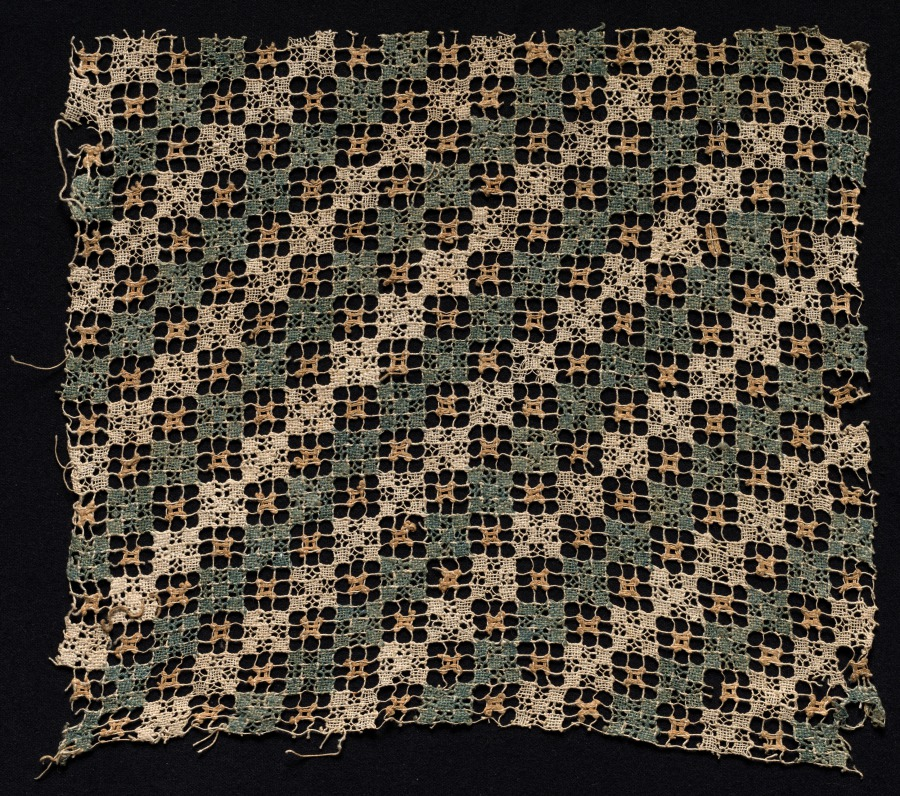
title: Fragment with Repeated Square Pattern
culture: Italy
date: 1500s–1600s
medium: Bleached, dyed, and unbleached linen (est.): needle lace; filet/lacis (knotted ground and darned in two directions)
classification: Lace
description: The prominent colors on this fragment of lace also determine the diagonal and square patterns within the textile. The dark yellow is unbleached linen, the white is bleached linen, and the blue is linen that has been bleached and dyed.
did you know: The word lace derives from the Latin laqueus, meaning noose.